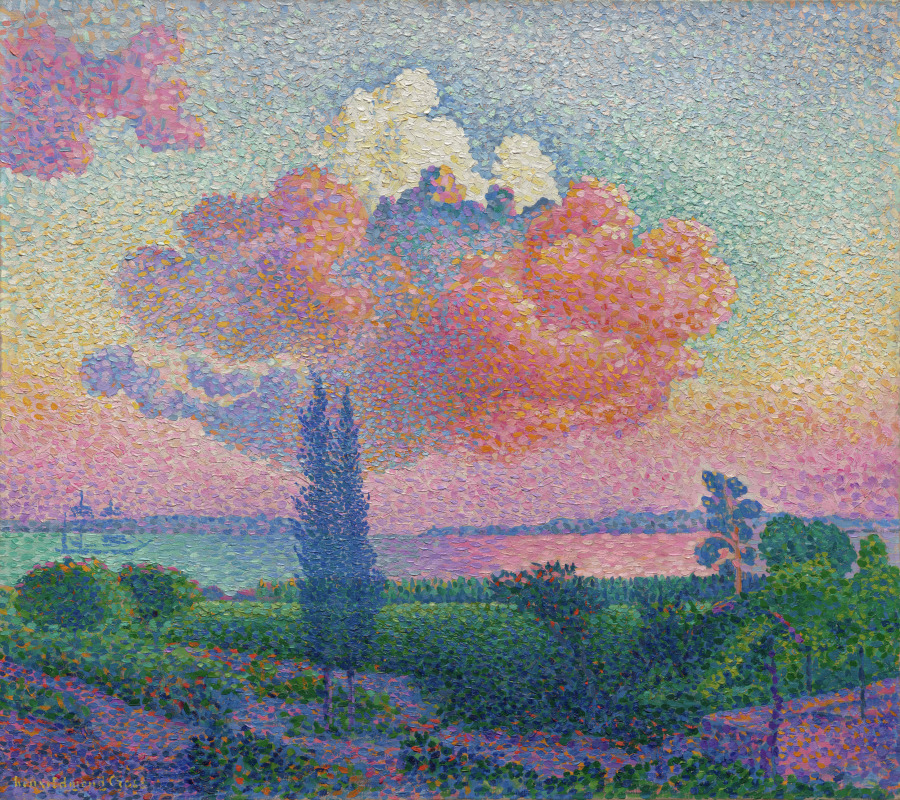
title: The Pink Cloud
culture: France, 19th century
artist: Henri-Edmond Cross (French, 1856–1910)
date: c. 1896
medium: oil on canvas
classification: Painting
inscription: Signed lower left: henri Edmond Cross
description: Due to his diagnosis of persistent rheumatism, Henri-Edmond Cross left Paris in 1891 and settled in the seaside village of Saint-Clair on the Mediterranean coast where the climate was more temperate. He expressed his enthusiasm for the French Riveria to his mother, “In the distance, the blue silhouette of the Maures and the Estérel—I have enough here to keep me busy all of life—I have just discovered happiness.” Once he had settled in the south, Cross adopted the Neo-Impressionist technique of Pointillism—applying paint in small dots or dashes of complementary colors that mix in the beholder’s eye to create an intense sensation of color and light. Here, a spectacular cloud is illuminated by the sunset. A pair of cypress trees link the garden landscape below to the vivid sky above.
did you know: Drawn to the beauty of the landscape and the climate that improved his chronic rheumatism from its state in Paris, Cross moved to the south of France where he made a home with his wife, Irma Clare, in Saint-Clair, a small village near the coast.